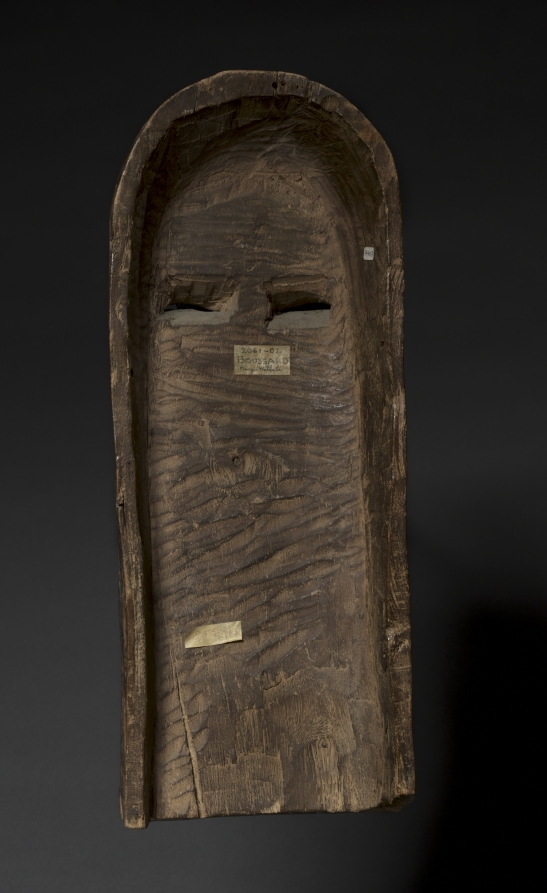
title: Mask (Emangungu)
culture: Africa, Central Africa, Democratic Republic of Congo, Bembe-style maker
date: possibly early 1900s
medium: Wood, kaolin, colorant, and iron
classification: Mask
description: Among the Bembe, anthropo-zoomorphic plank masks are used in circumcision rites called butende. They are worn along with a costume of bark and banana leaves by the initiated boys who beg for food in the village while living in seclusion in the forest. The sculpture’s short projections above the forehead are identified as an owl’s tufts. The two pairs of eyes could refer to divination.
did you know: White kaolin clay highlights the eyes of this carved wooden mask.